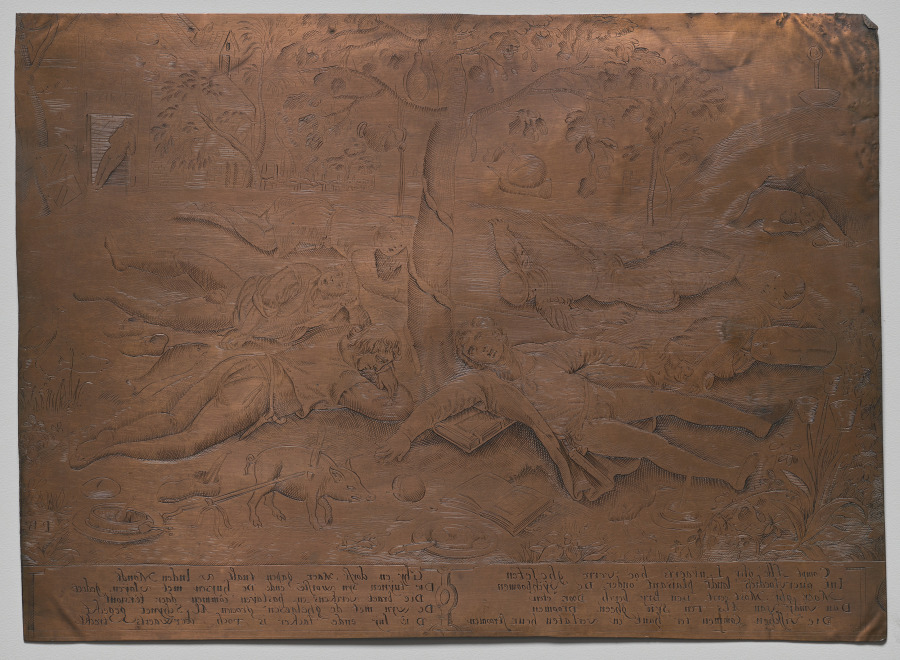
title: Gluttony (Land of Cockaigne)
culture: Flanders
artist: Peeter Baltens (Flemish, 1526/28–before 1584)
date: 1560s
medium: engraved copper plate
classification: Plate